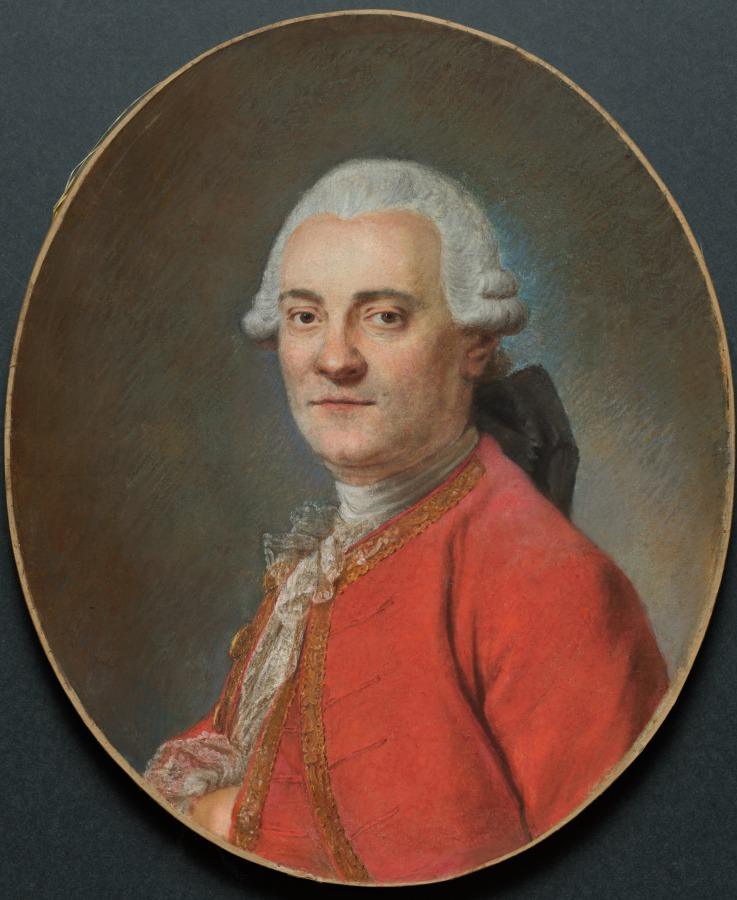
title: Portrait of a Man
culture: France, 18th century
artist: attributed to Maurice Quentin de La Tour (French, 1704–1788)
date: 1700s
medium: pastel on gray paper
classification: Drawing